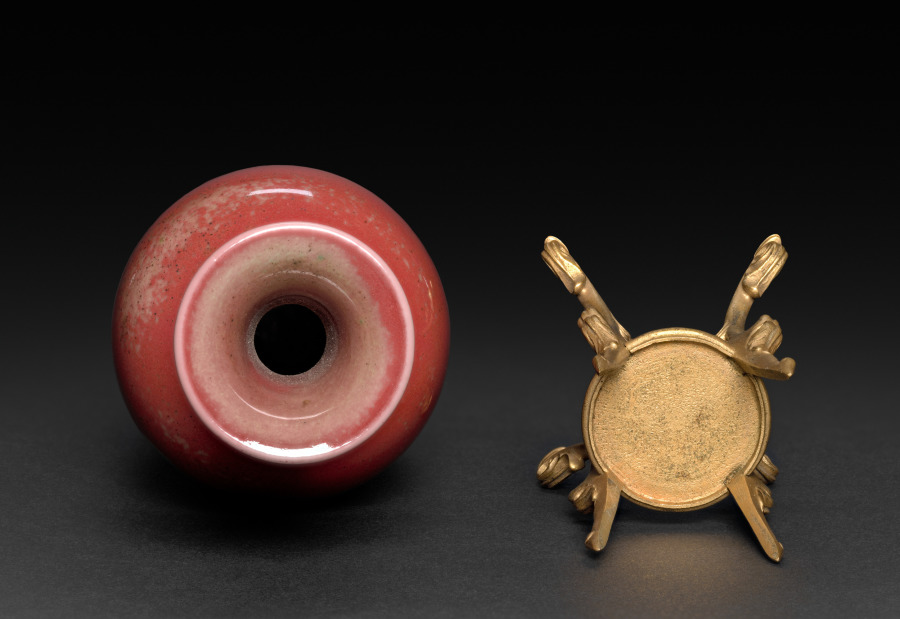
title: Bottle with Peach Bloom Glaze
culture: China, Qing dynasty (1644-1911), Kangxi reign (1661-1722)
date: 1662–1722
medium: porcelain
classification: Ceramic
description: The "peach-bloom" glaze developed during the Kangxi era has also been described as "drunken with beauty." Technical achievements were transcended with aesthetic associations, revealing the greatest sensitivity to all things beautiful in nature.